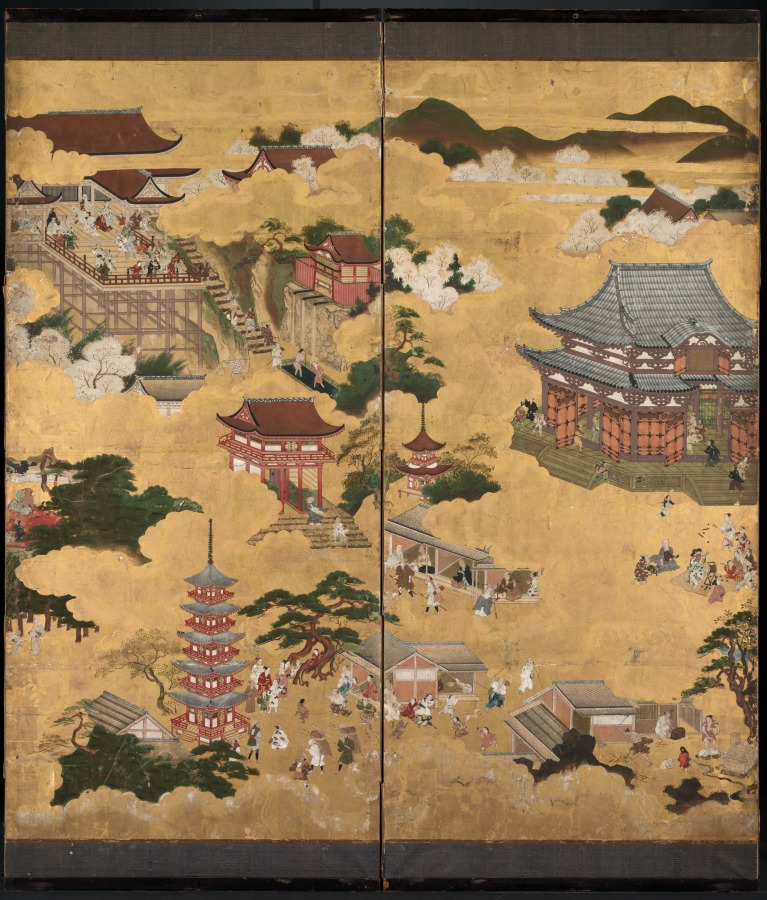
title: Views of Kyoto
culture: Japan, Edo period (1615–1868)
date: 1600s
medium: six-fold screen; ink and color on gold paper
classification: Painting